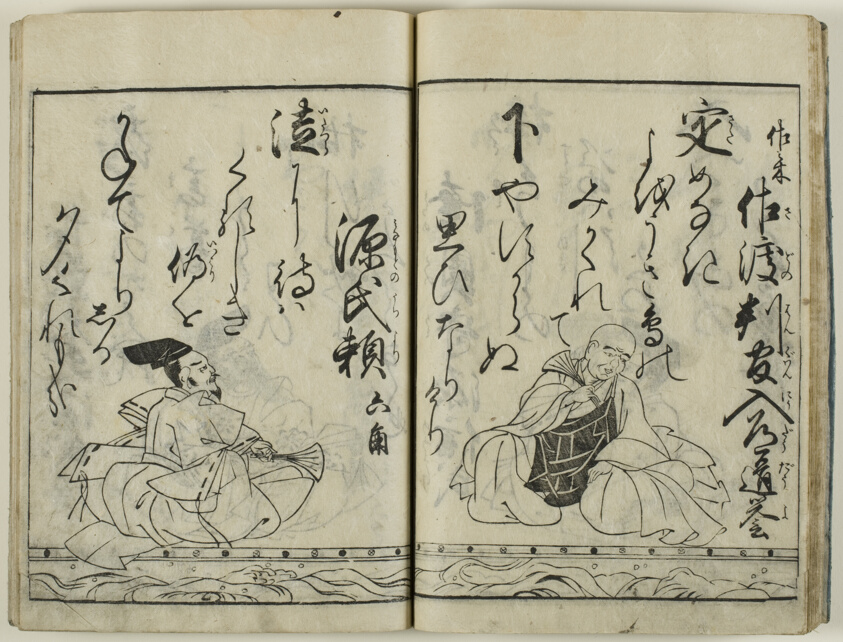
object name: Book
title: Buke hyakunin isshu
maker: Attributed to Hishikawa Moronobu (1618-1694); Japanese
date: reprint of 1703 edition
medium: Woodblock printed book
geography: Japan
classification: book; asian art